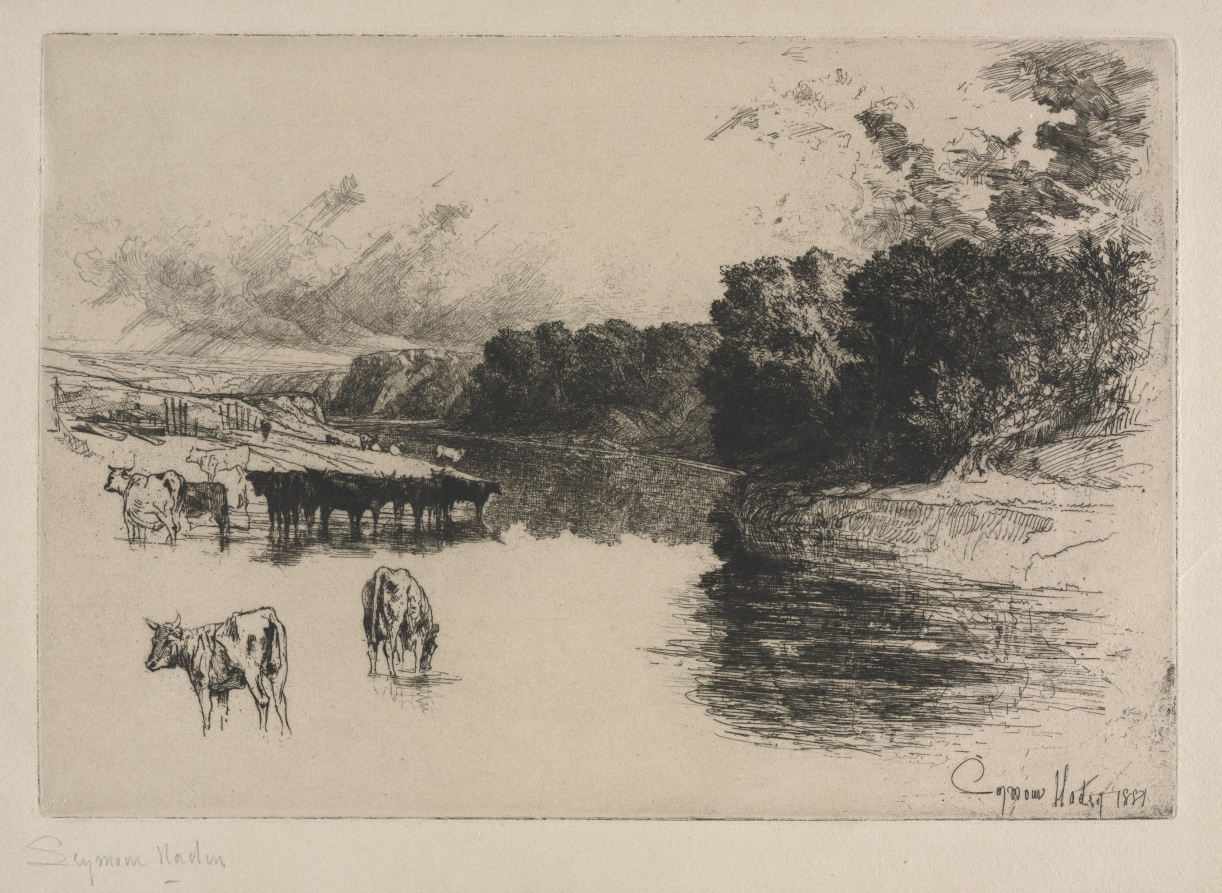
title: A Lancashire River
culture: England, 19th century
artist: Francis Seymour Haden (British, 1818–1910)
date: 1881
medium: etching and drypoint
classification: Print